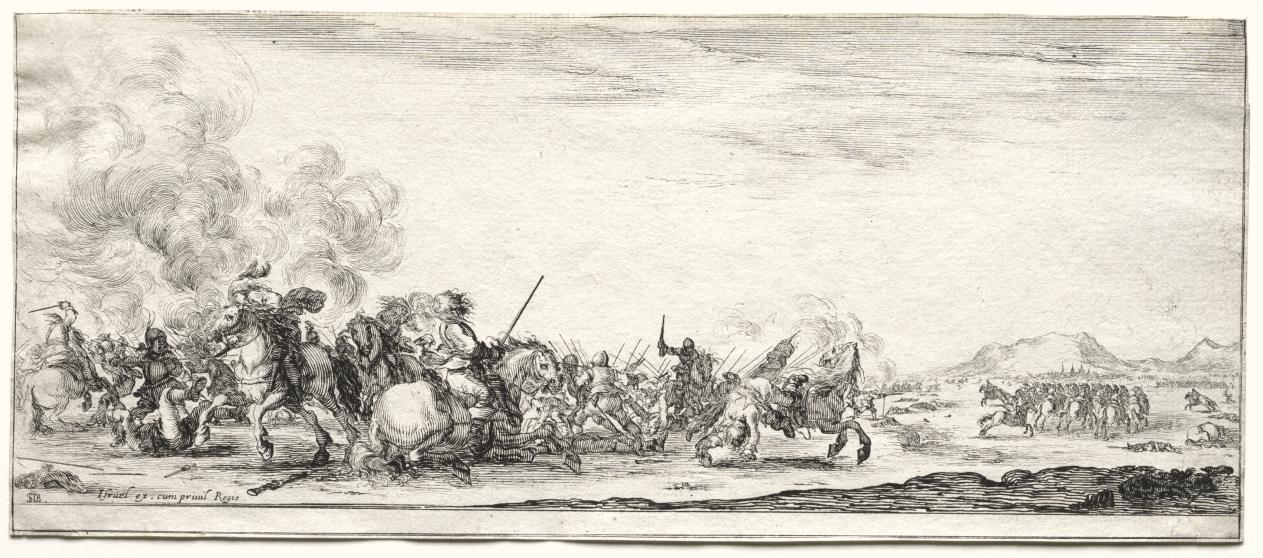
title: Peace and War: Cavalry Skirmish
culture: Italy, 17th century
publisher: Israël Henriet (French, c. 1590–1661)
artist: Stefano Della Bella (Italian, 1610–1664)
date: c. 1641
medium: etching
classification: Print